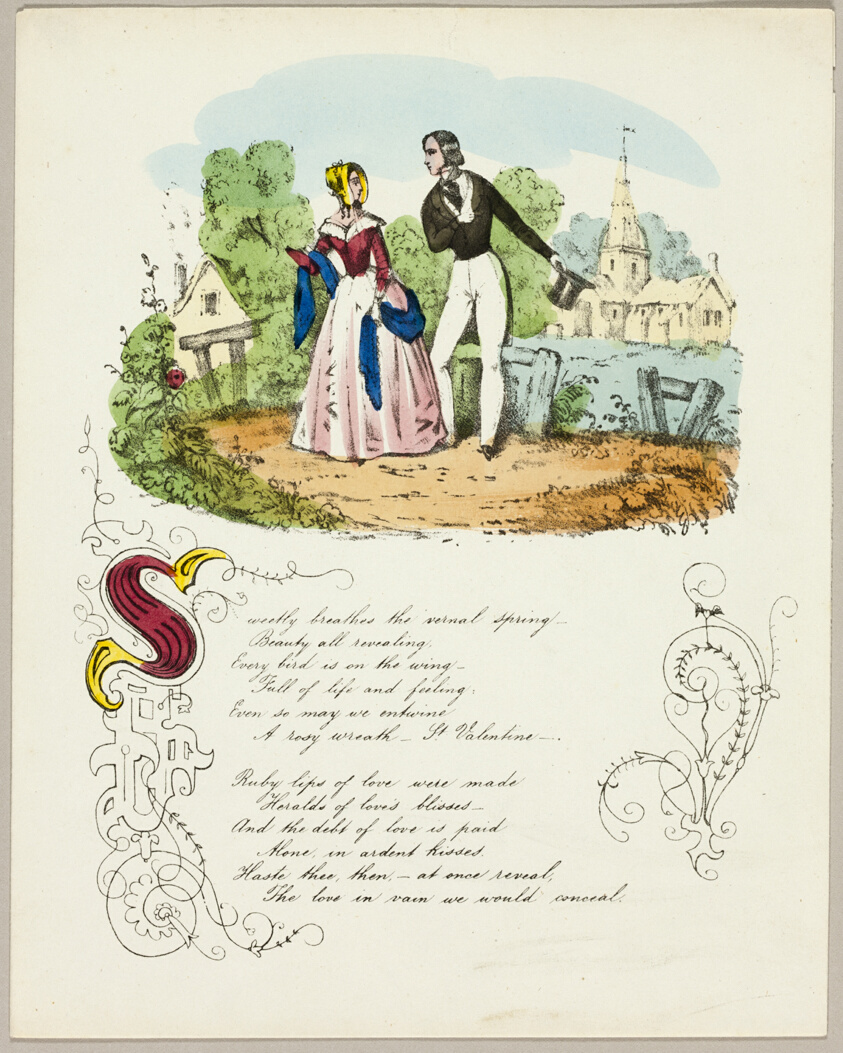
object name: Print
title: Sweetly Breaths the Vernal Spring (valentine)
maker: Unknown Artist; English, 19th century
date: c. 1842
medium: Lithograph with hand-coloring on ivory wove paper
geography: England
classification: valentine; prints and drawing; print